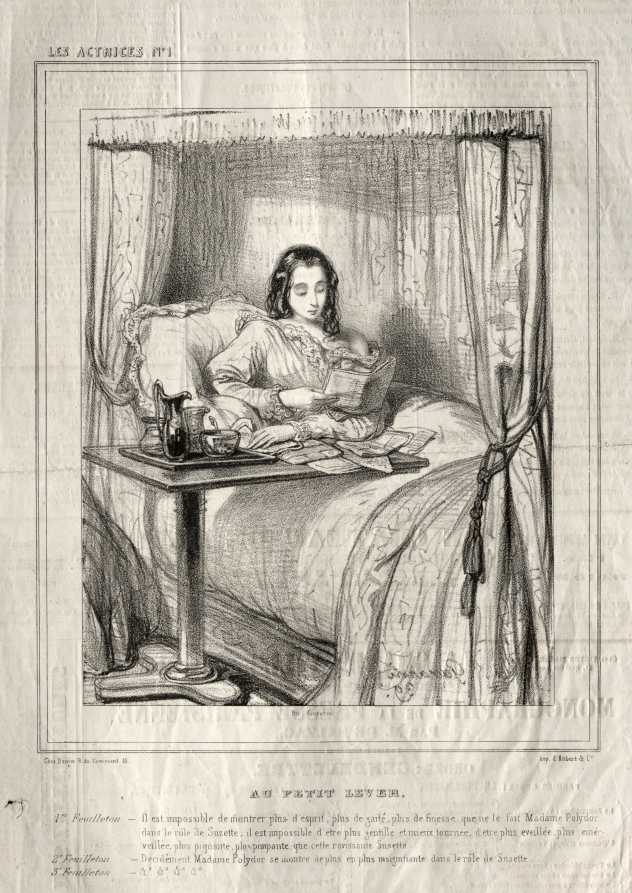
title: Les Actrices: Au petit lever...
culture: France, 19th century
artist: Paul Gavarni (French, 1804–1866)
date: 1843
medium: lithograph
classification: Print